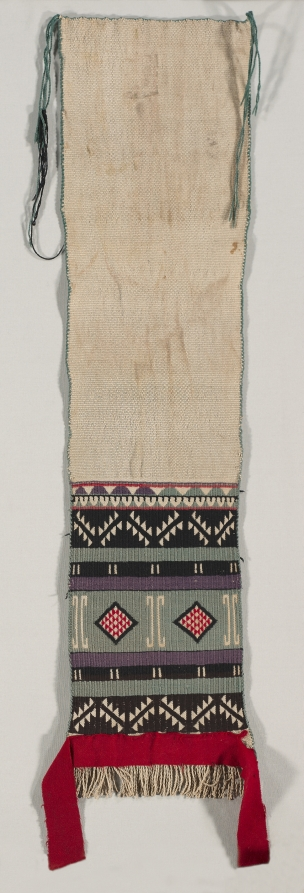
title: "Hopi Brocade" style Dance Sash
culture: America, Native North American, Southwest, Pueblo (Hopi?), Post-Contact, Transitional Period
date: c. 1880–1900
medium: plain weave with supplementary weft wrap: cotton and wool (handspun, Germantown, and bayeta)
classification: Textile